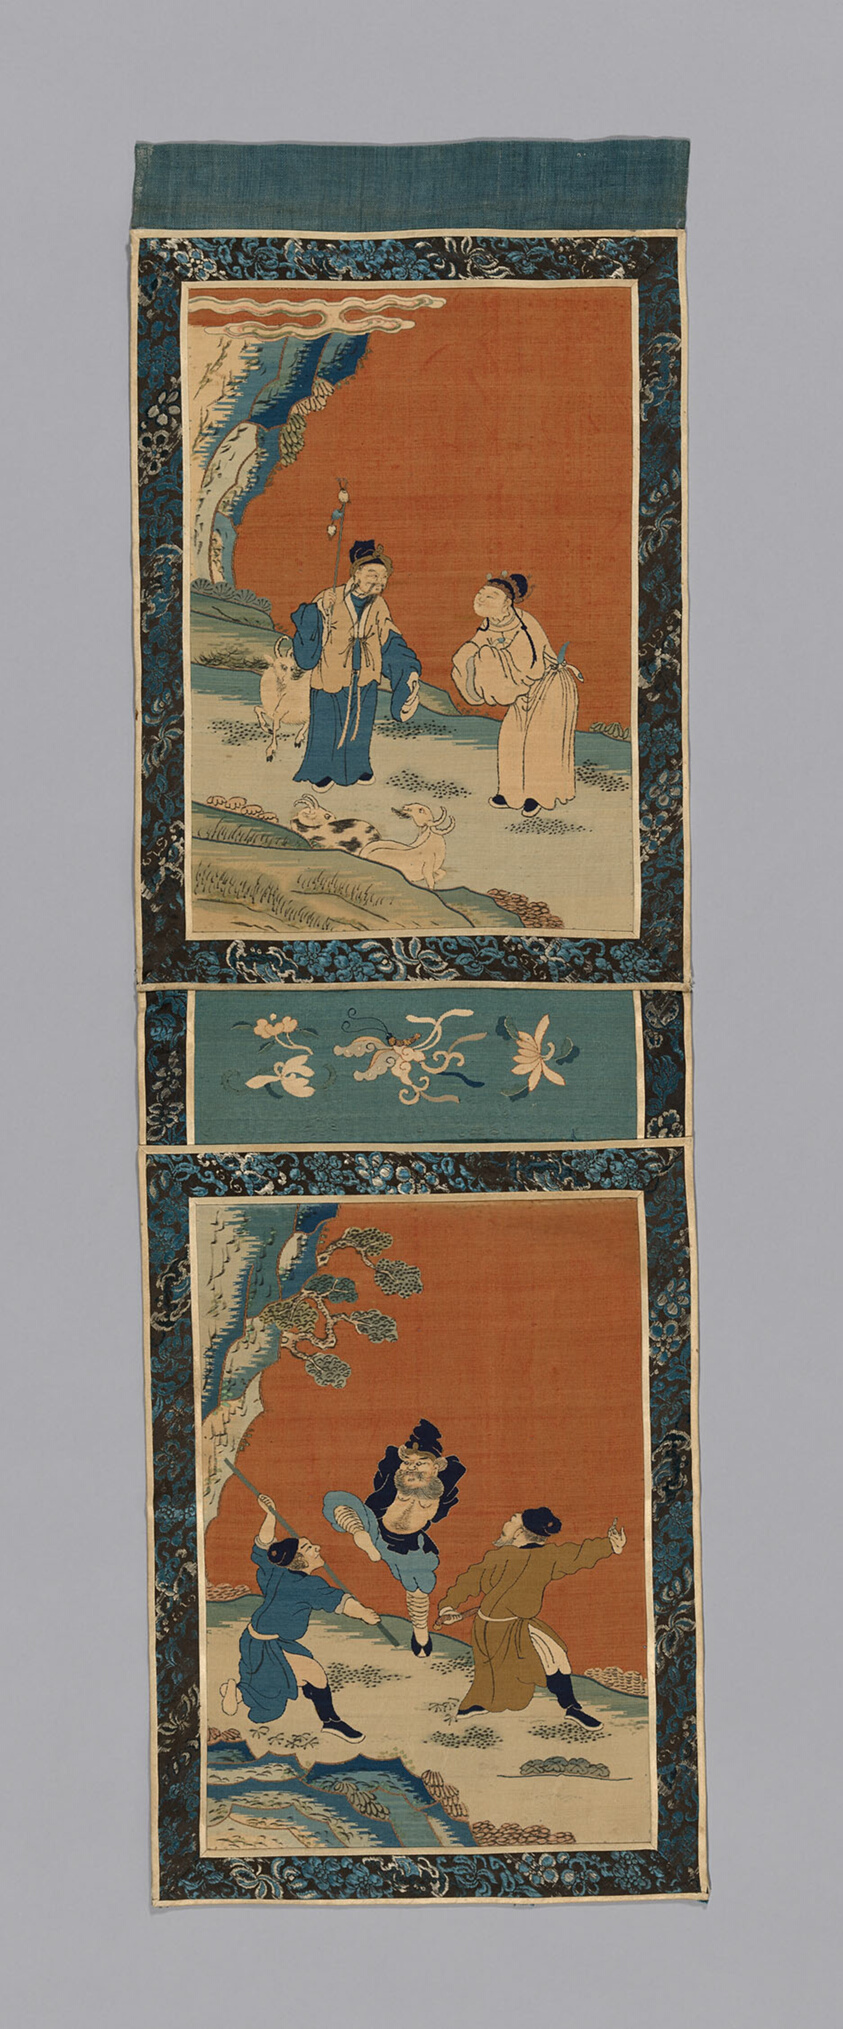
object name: Textile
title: Panel (For a Screen)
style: qing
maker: China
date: Qing dynasty (1644–1911), 1875/1900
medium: Silk and gold-leaf-over-lacquered-paper-strip-wrapped silk, slit tapestry weaves; painted details; border: silk, warp-float faced 7:1 satin weave with supplementary patterning wefts; inner and outer edges: silk, warp-float faced 4:1 satin weave; lined with linen, plain weave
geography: China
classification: textile; weaving